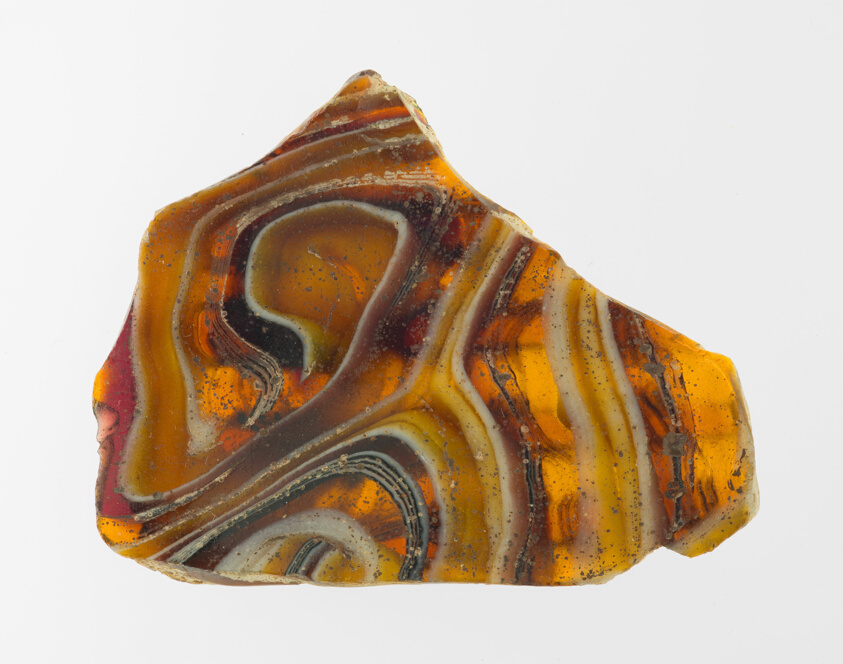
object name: Decorative Arts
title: Fragment of a Bowl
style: roman (ancient, style or period), ancient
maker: Roman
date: 1st century BCE–1st century CE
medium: Glass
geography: Roman Empire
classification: fragment; vessel; bowl; decorative arts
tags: decoration